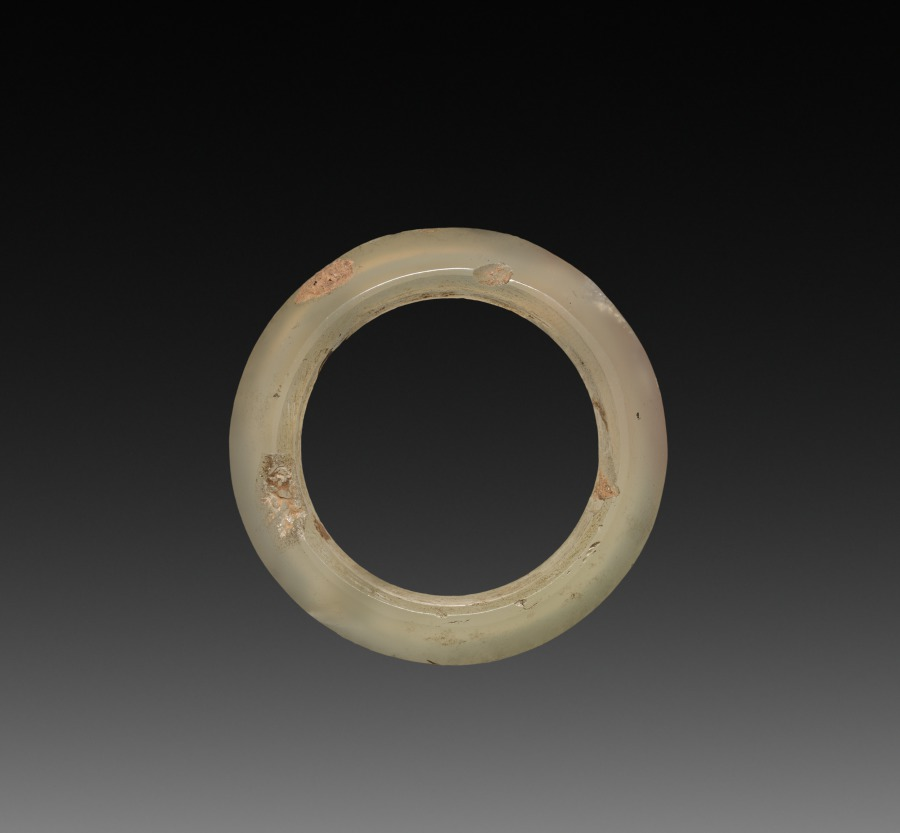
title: Ring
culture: China, Han dynasty (202 BCE–220 CE) or later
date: 200 CE or later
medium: agate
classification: Jewelry